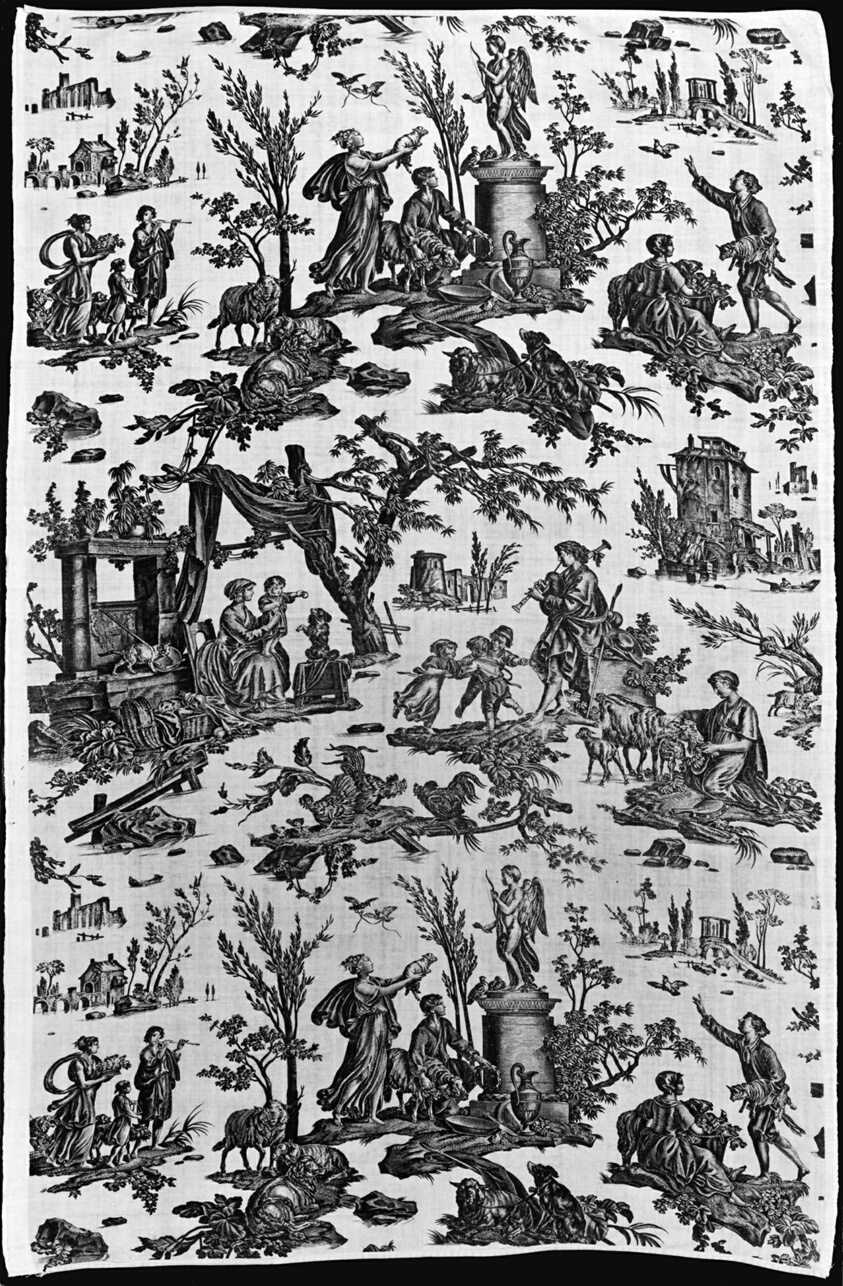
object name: Textile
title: Le Sacrifice à l'Amour (Offrande à l'Amour) (Furnishing Fabric)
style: jouy-en-Josas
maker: Designed by Jean Baptiste Huet (French, 1745–1811); Manufactured by Christophe-Philippe Oberkampf (naturalized French, 1738-1815), Oberkampf Manufactory (French, 1760-1843); Jouy-en-Josas, France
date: c. 1795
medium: Cotton, plain weave; copperplate printed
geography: Jouy-en-Josas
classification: textile; weaving - printed; furnishing textile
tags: dogs, cats, sheep, shepherds, dancing, musical instruments, offering, fowl, mother, children